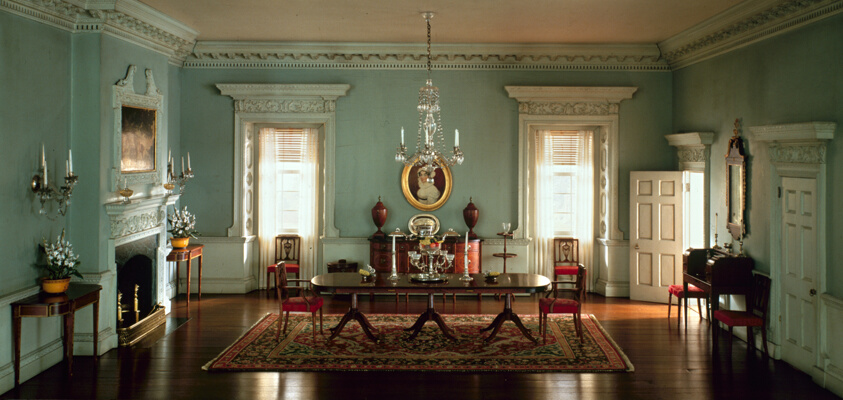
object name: Miniature room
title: A19: Maryland Dining Room, 1770-74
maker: Designed by Narcissa Niblack Thorne; American, 1882-1966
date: c. 1940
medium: Miniature room, mixed media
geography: United States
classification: miniature; thorne rooms